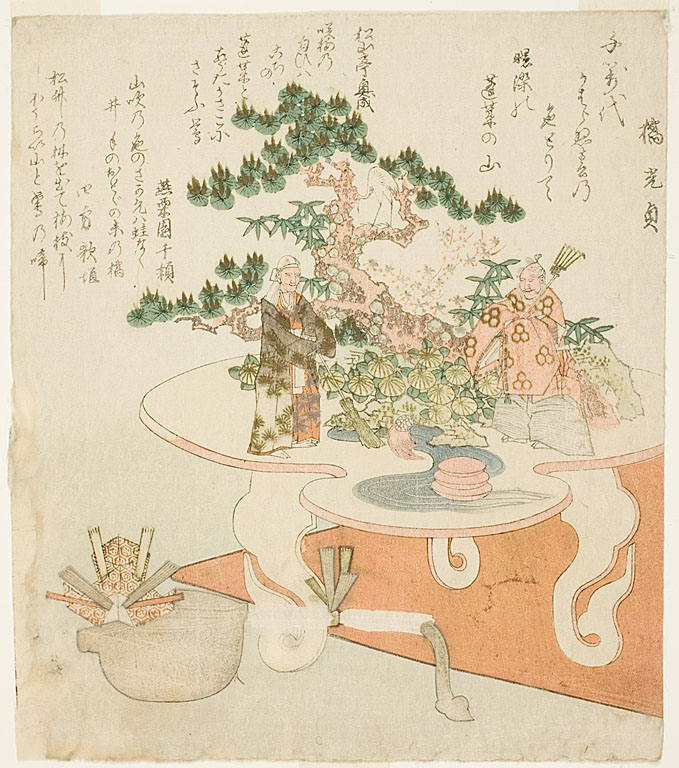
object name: Print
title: Shimadai, or Island-stand for Wedding Arrangement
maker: Totoya Hokkei (Japanese, 1780-1850)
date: 19th century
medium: Color woodblock print; surimono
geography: Japan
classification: woodblock print; print; asian art